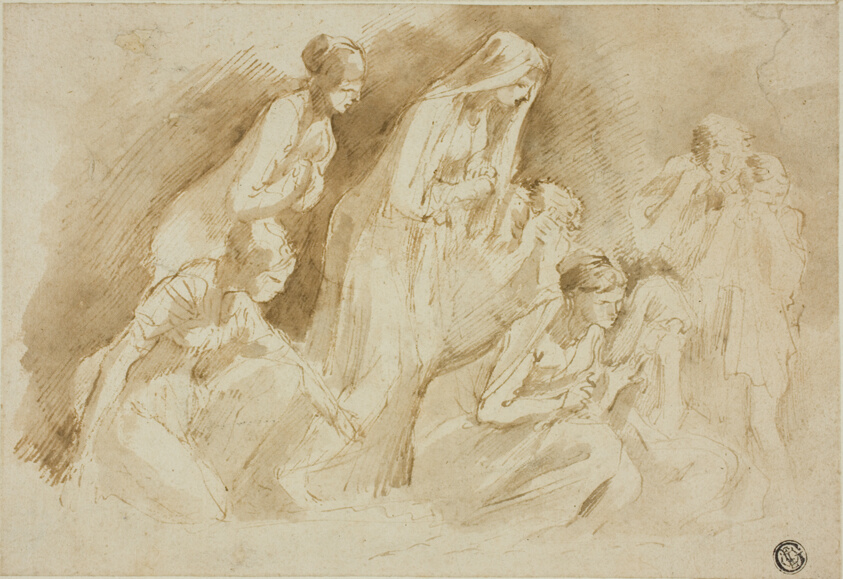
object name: Drawing and Watercolor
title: Mourners Over the Dead Christ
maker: Unknown Italian artist; after Giovanni Benedetto Castiglione (Italian, 1609-1664); possibly Giuseppe Bernardino Bison; Italian, 1609-1664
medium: Pen and brown ink with brush and brown wash, on ivory laid paper, laid down on ivory laid card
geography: Italy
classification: pen and ink drawings; drawings (visual works); prints and drawing